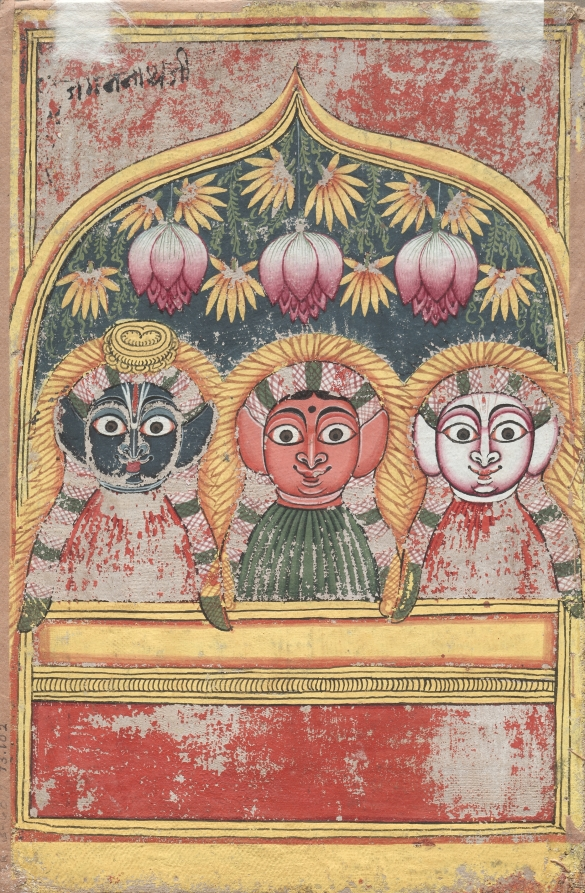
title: Jagannath, Subhadra and Balarama in an Arch (verso)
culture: Southern India, Andhra Pradesh, possibly Tirupati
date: 1700s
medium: color on cloth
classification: Painting